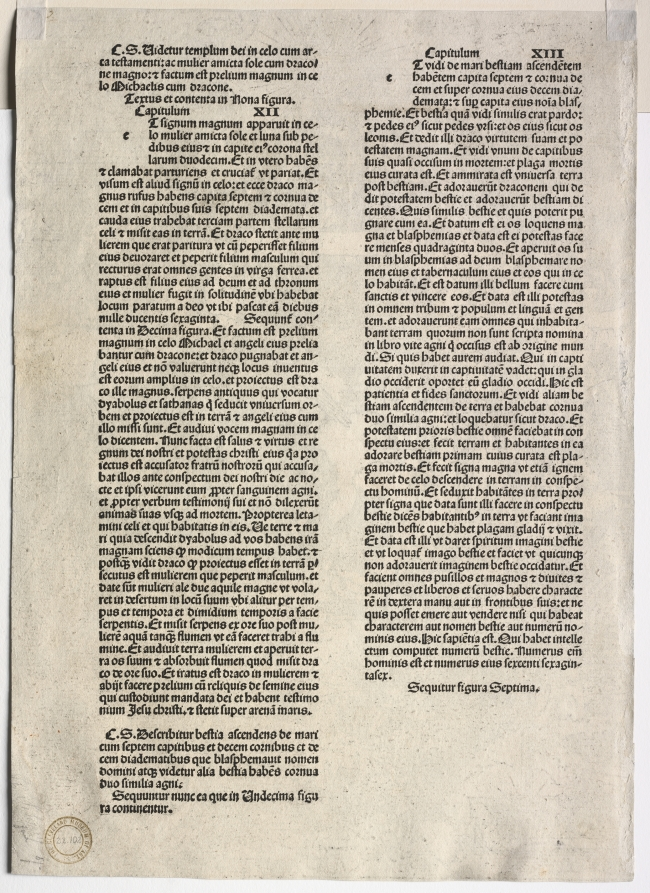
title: Revelation of St. John: Seven Angels with Trumpets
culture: Germany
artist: Albrecht Dürer (German, 1471–1528)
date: 1511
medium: woodcut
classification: Print